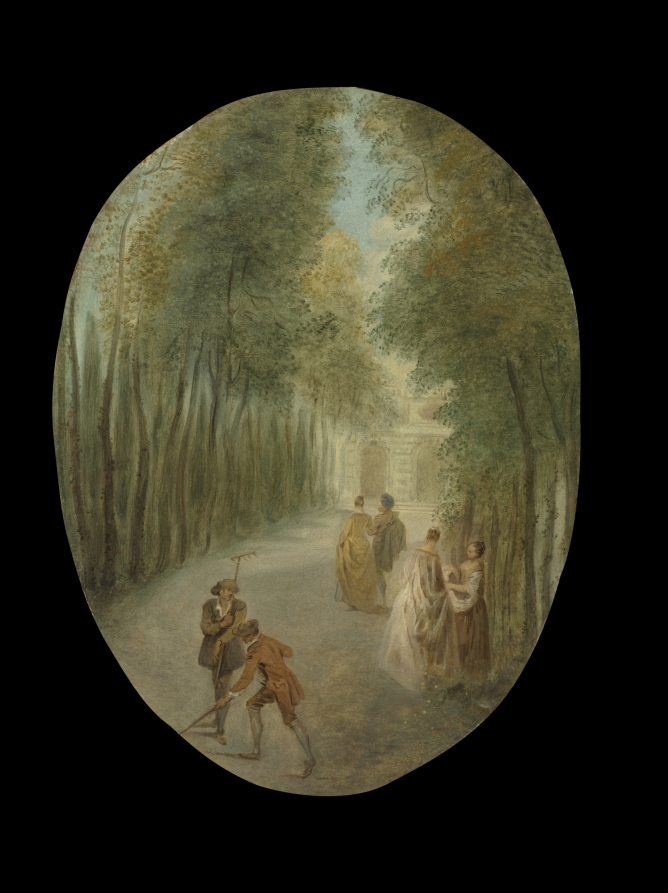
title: Spring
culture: France, 18th century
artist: Jean-Baptiste Pater (French, 1695–1736)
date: c. 1720–36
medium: oil on canvas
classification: Painting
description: Spring and Summer are two scenes from a four-season series. These landscapes were originally a part of a screen or a decorative panel, indicated by their floral borders and oval shape. The setting of Spring is believed to be the grounds of Montmorency, the country estate of Pierre Crozat (1665–1740), a wealthy financier and art collector in early eighteenth-century Paris. Summer counters Spring's aristocratic leisure by depicting rural labor. Befitting the work's decorative origins, however, Pater's scene belongs to the tradition of the timeless pastoral. More idyllic than a statement about class differences, the reapers peacefully gather sheaves of wheat as shepherds rest with their flocks in the foreground.